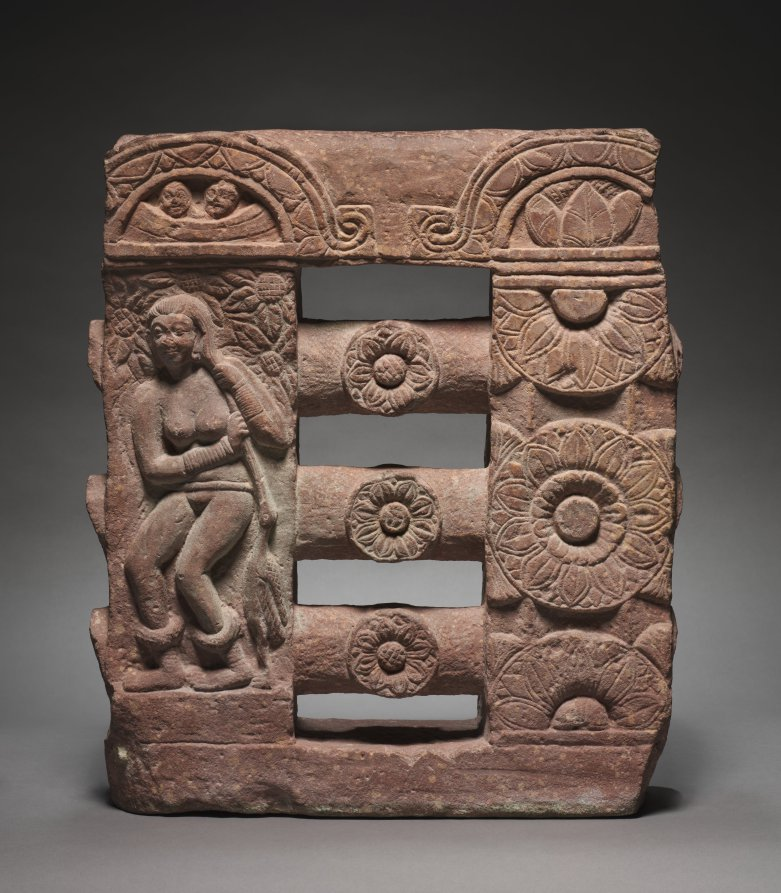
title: Section of Monolithic Railing with Bather and Lotus Medallions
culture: India, Mathura, Kushan period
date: c. 150–250 CE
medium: red sandstone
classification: Sculpture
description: Railings demarcated a sacred space, such as a tree shrine or a stupa. Images associated with purifying waters were carved on the railings, as if to symbolically cleanse those who passed through the gate. Under a fruit-bearing tree is a young woman squeezing water from her hair. In a visual depiction of an ancient Indian poetic trope, a goose mistakes the drops of water for pearls and comes to eat them.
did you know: In the windows above, carved on the coping stone, are two voyeurs and a bowl made of leaves filled with flower garlands, which would be used to adorn the sacred site.